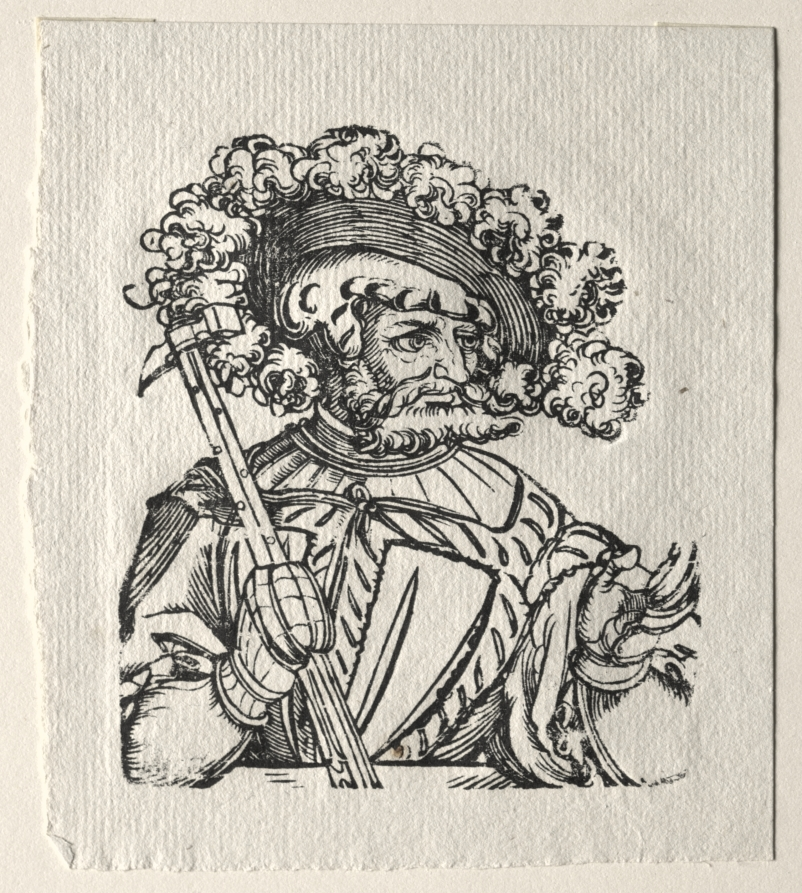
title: Tyrants of the Old Testament: Holofernes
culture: Germany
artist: Georg Pencz (German, c. 1500–1550)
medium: woodcut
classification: Print